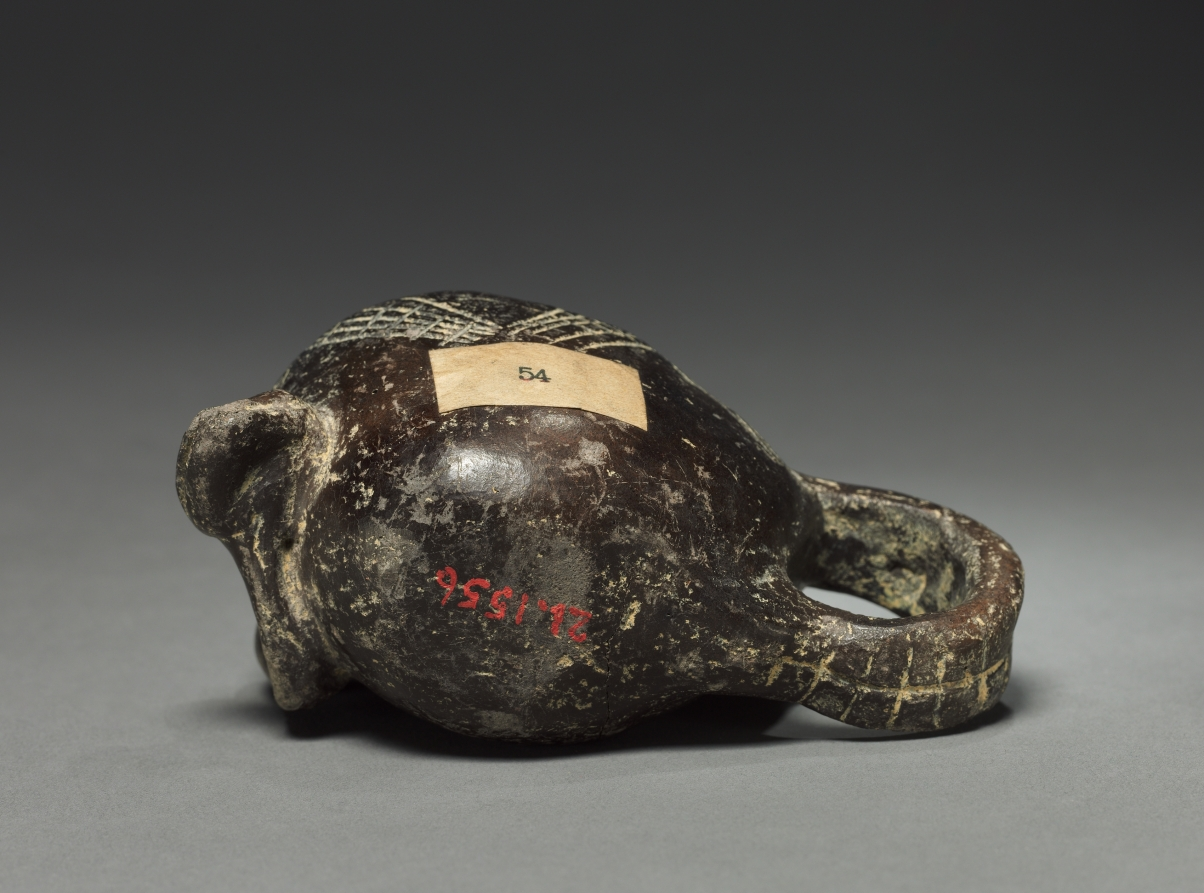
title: Dish with Handle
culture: Colombia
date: before 1921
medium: pottery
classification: Ceramic